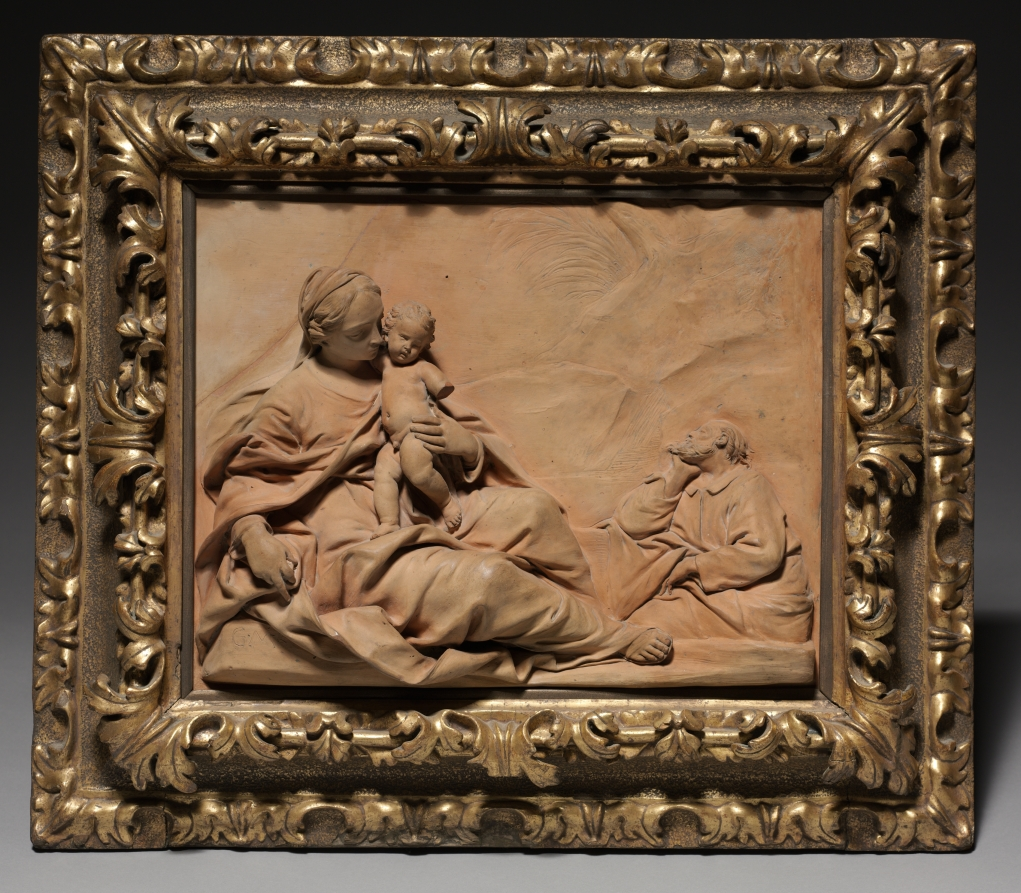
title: Rest on the Flight into Egypt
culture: Italy, Bologna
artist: Giuseppe Mazza (Italian, 1653–1741)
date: c. 1700–1710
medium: terracotta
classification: Sculpture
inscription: inscription in lower left corner: "G.M."